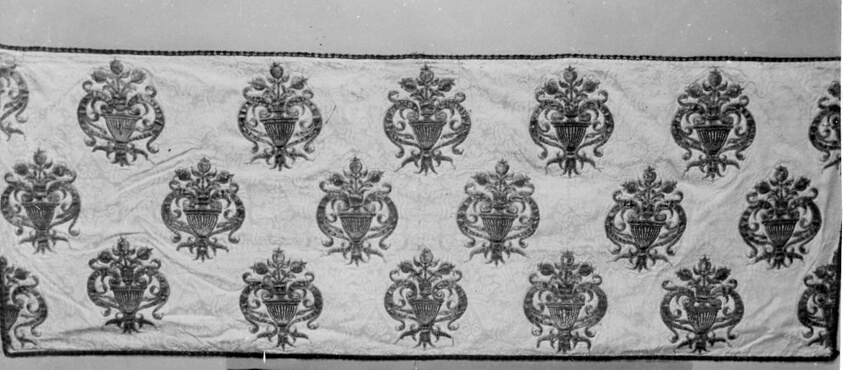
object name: Textile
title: Panel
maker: Spain, Catalonia, Lérida, Seo de Urgel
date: 16th century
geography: Seo de Urgel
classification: textile; needlework (visual works); liturgical